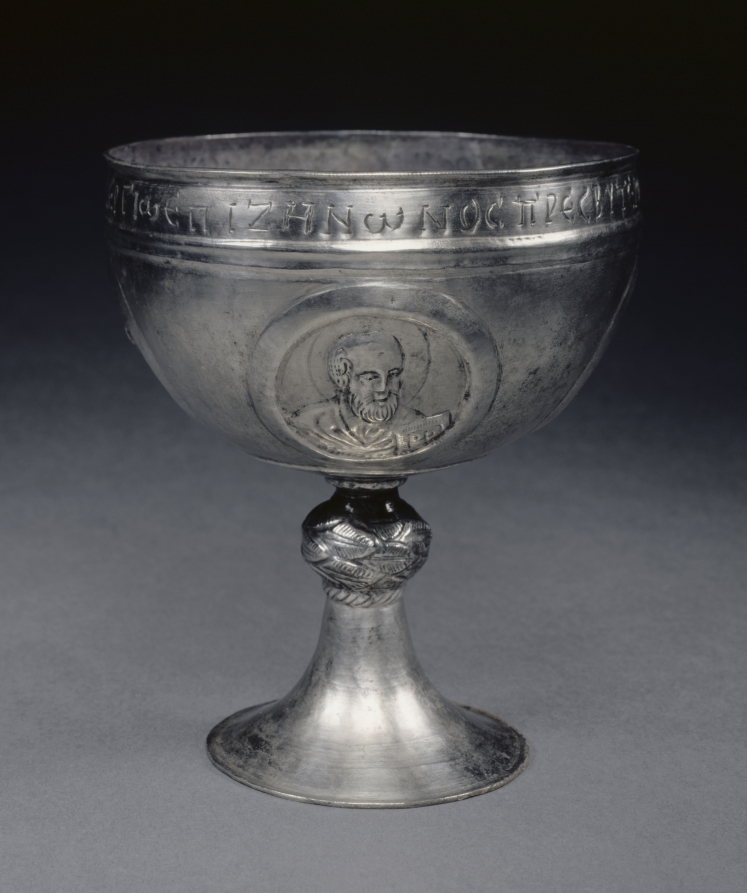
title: Chalice from the Beth Misona Treasure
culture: early Byzantium, Constantinople or Syria, Byzantine period, 6th-7th Century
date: c. 500–700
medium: silver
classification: Metalwork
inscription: the Greek inscription at the top, under an engraved line translates as: + The priest, KYRIAKOS, son of DOMNOS, (gave this chalice) to St. Sergios, in the time of Zeno the priest.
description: These four liturgical silver vessels—a paten and three chalices (1950.378–81)—form what is now called the Beth Misona Treasure, named for the village in northern Syria for which the objects were made. While nothing is known about the exact location and circumstances of the treasure's discovery, the people of the village of Beth Misona were, like other Christian communities in Syria and Palestine, probably forced to bury their church silver to hide it from the Persians or Arabs, who conquered their lands in the first half of the 600s. The paten, which held pieces of Eucharistic bread used during Mass, is decorated with an engraved Latin cross surrounded by a dedicatory inscription that names the paten's donor—Domnos—and its original location, the church of Saint Sergios in Beth Misona. The chalices, which contained the Eucharistic wine used during Mass, feature broad cups decorated with portrait busts of Saints Peter and Paul, Christ, and the Virgin. One chalice bears a dedicatory inscription naming its donor—Kyriakos, Domnos's son—and the priest of the church that received the pious gift—Zeno.